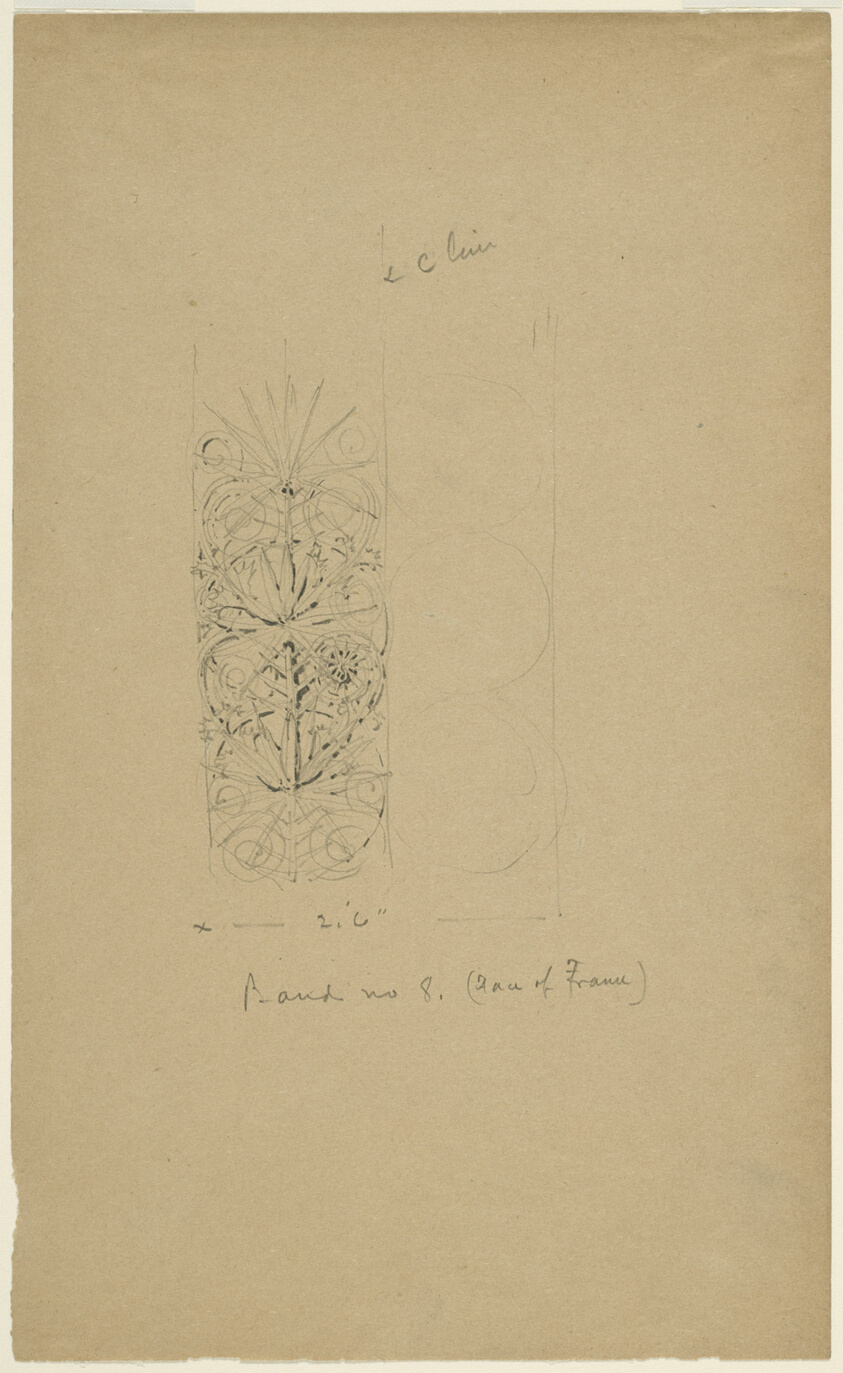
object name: Architectural Drawing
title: McVickers Theater, Chicago, Illinois, Sketch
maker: Louis H. Sullivan (American, 1856–1924)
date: c. 1883–1891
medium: Graphite on paper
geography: Madison Street, 78-84 West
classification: architectural drawing; architecture; design sketch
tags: Chicago